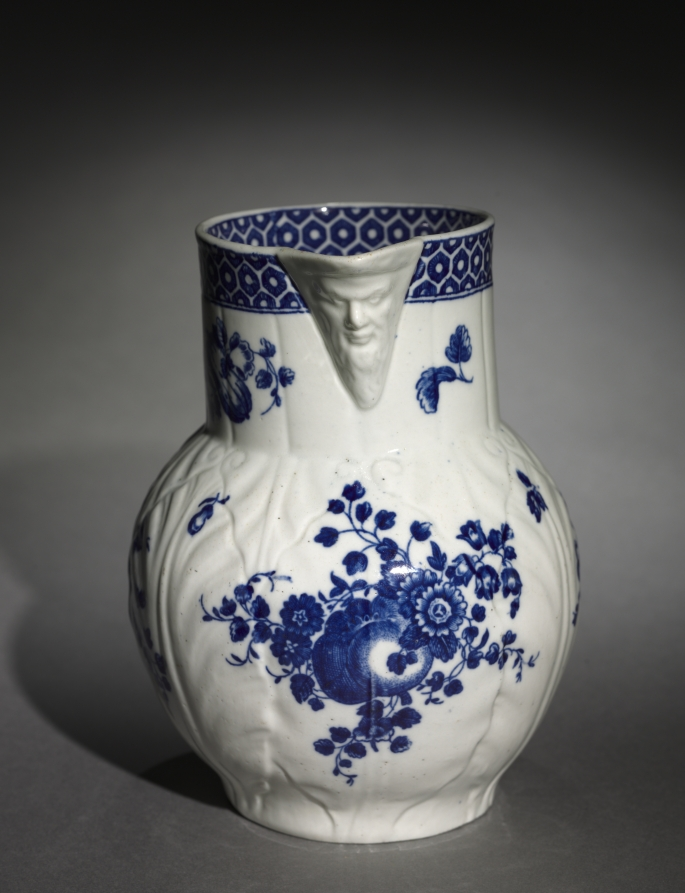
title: Pitcher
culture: England, 18th century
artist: Worcester Porcelain Factory (British, established 1751)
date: c. 1750–70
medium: porcelain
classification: Ceramic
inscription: Half moon mark on the bottom.